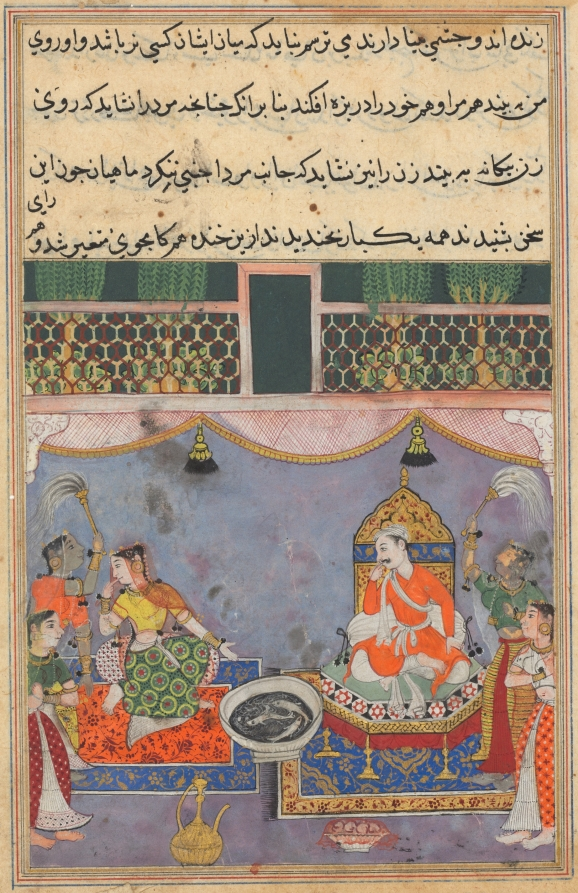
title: Kamjuy, the wife of the Raja, averts her face from the fishes, from a Tuti-nama (Tales of a Parrot): Twenty-third Night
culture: Mughal India, court of Akbar (reigned 1556–1605)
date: c. 1560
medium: gum tempera, ink, and gold on paper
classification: Painting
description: On the left Kamjuy, chief of the Raja’s forty wives, turns away from the bowl of fish and hides her face behind her veil. She claims that it would be sinful to allow any male, even a fish, to see her. To the astonishment of both the Raja and Kamjuy herself, the fish immediately begin to laugh at her assertion.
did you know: Kamjuy and the Raja touch their index fingers to their mouths in gestures of surprise.